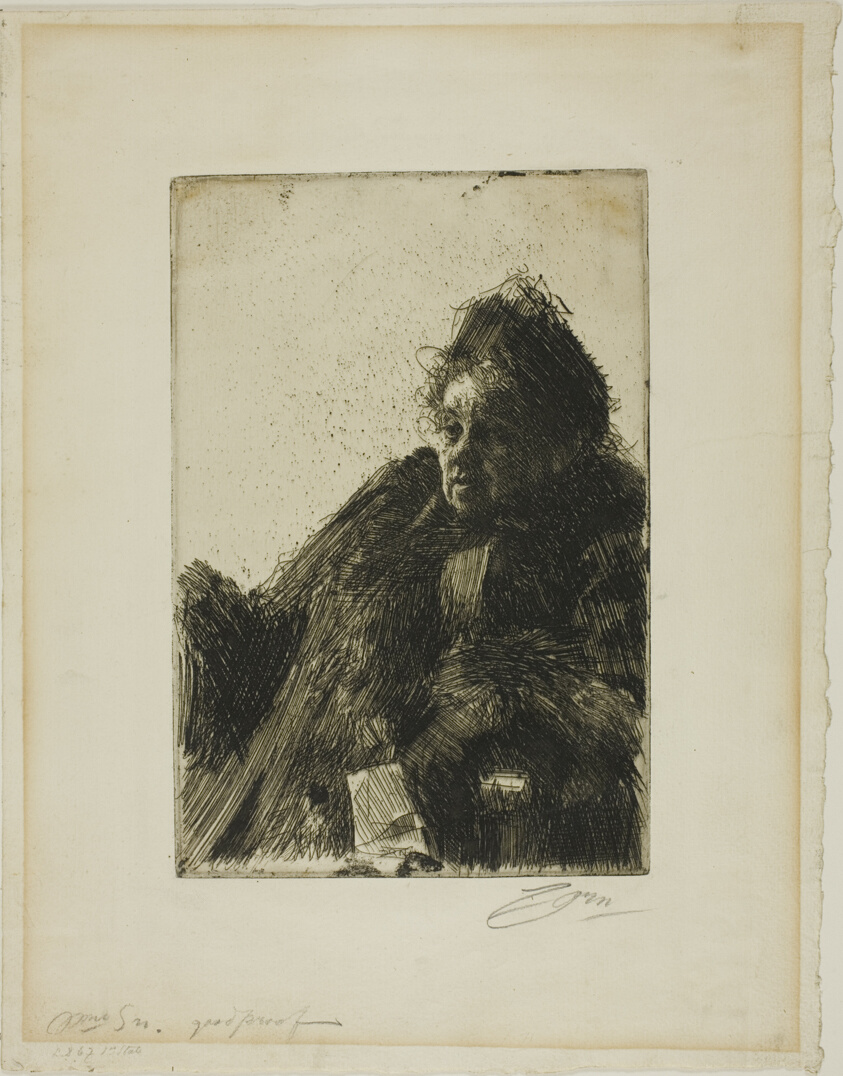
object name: Print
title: Mme Simon II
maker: Anders Zorn (Swedish, 1860-1920)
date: 1891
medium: Etching on ivory laid paper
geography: Sweden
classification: etching; print; prints and drawing